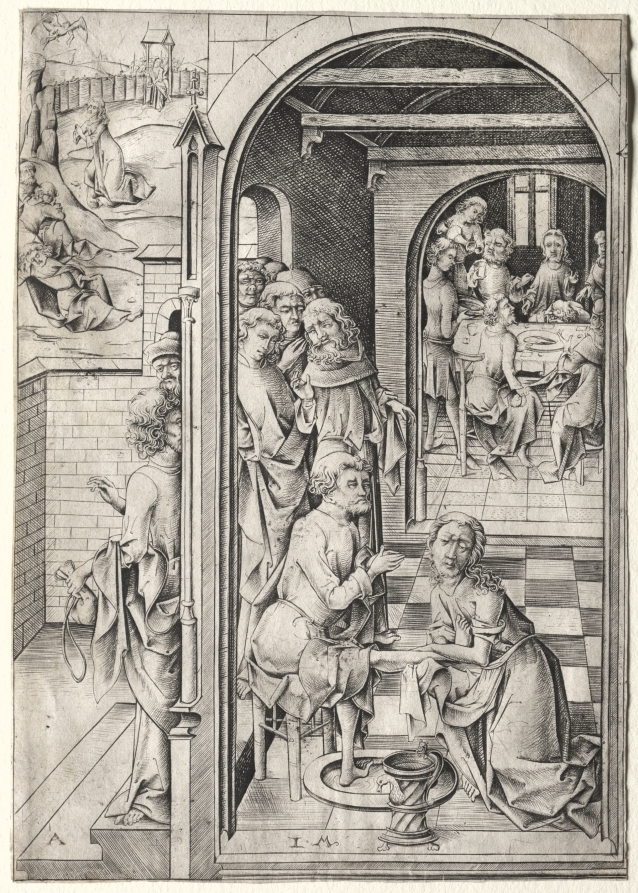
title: The Passion: Christ Washing the Feet of His Disciples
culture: Germany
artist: Israhel van Meckenem (German, c. 1440–1503)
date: c. 1480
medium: engraving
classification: Print